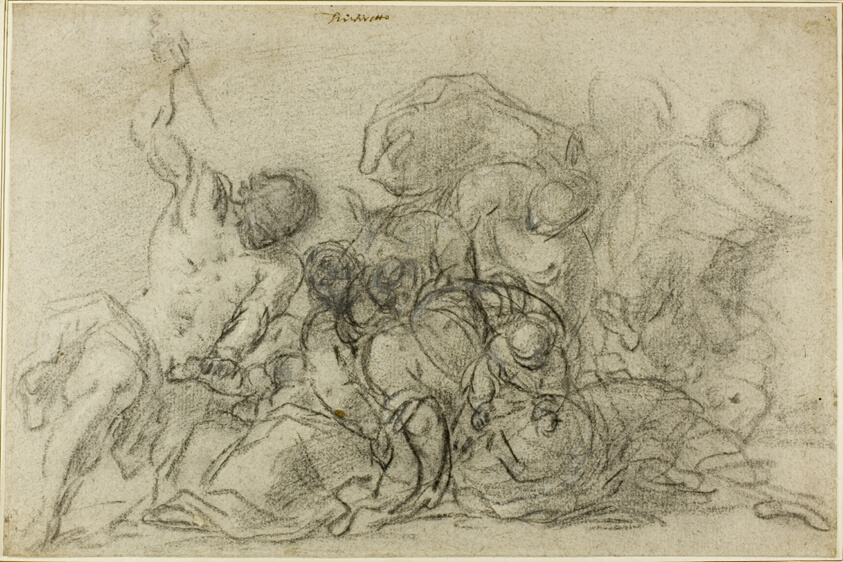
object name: Drawing and Watercolor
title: Massacre of the Innocents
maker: Circle of Tiziano Vecellio, called Titian; Italian, c. 1488-1576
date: 1585/1600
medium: Charcoal, heightened with touches of white chalk, on gray laid paper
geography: Italy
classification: chalk; drawings (visual works); prints and drawing